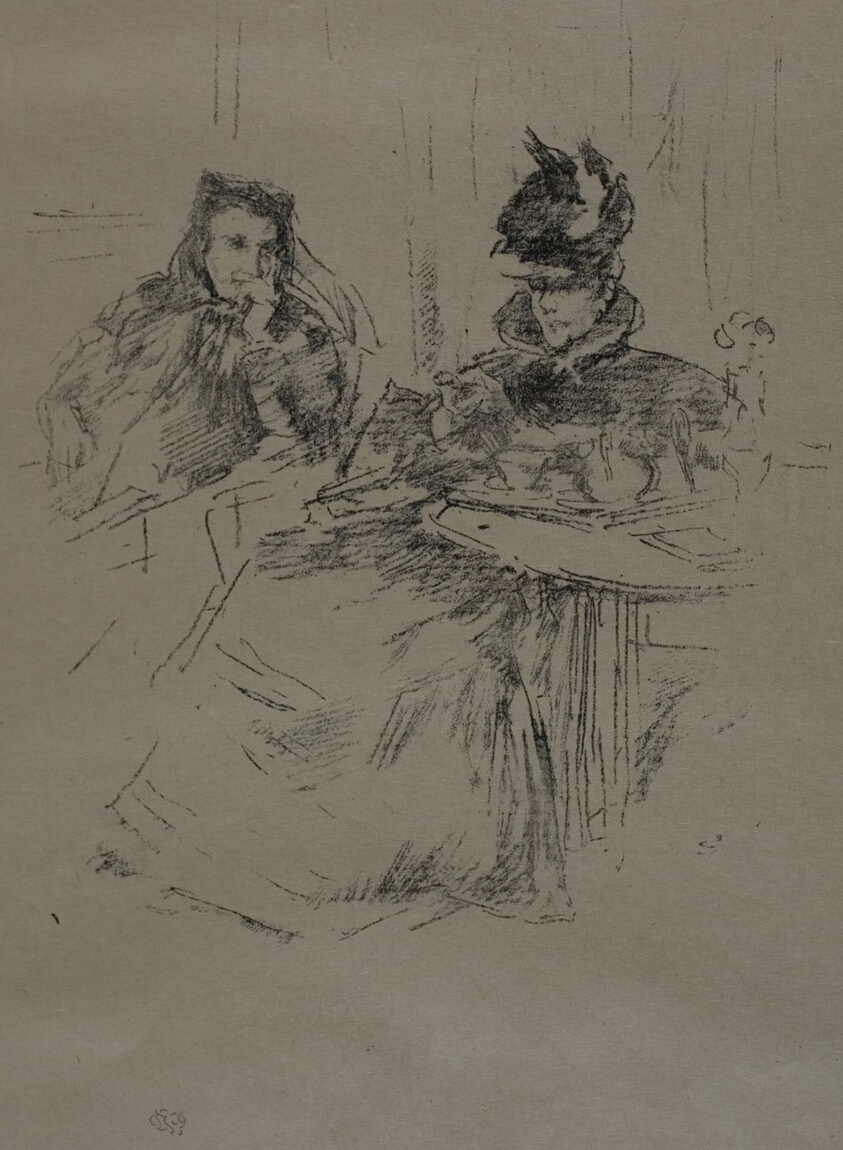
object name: Print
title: Afternoon Tea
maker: James McNeill Whistler (American, 1834-1903)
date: 1897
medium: Transfer lithograph in black on tan laid Japanese vellum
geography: United States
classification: transfer lithograph; lithograph; print; prints and drawing